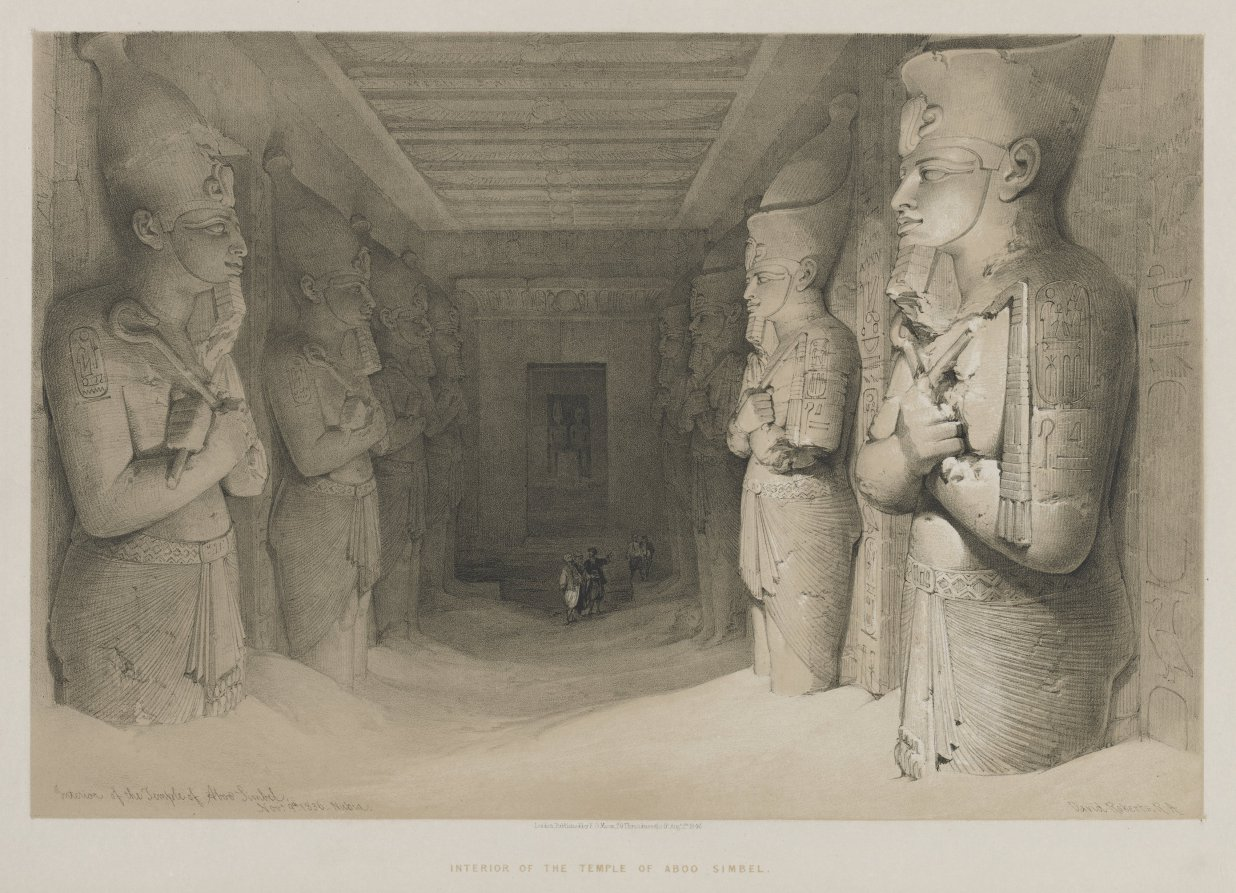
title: Egypt and Nubia, Volume I: Interior of the Temple of Aboo-Simbel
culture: England, 19th century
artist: Louis Haghe (British, 1806–1885)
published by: F. G. Moon (British, 1797–1871)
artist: after David Roberts (Scottish, 1796–1864)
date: 1846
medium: color lithograph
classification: Print